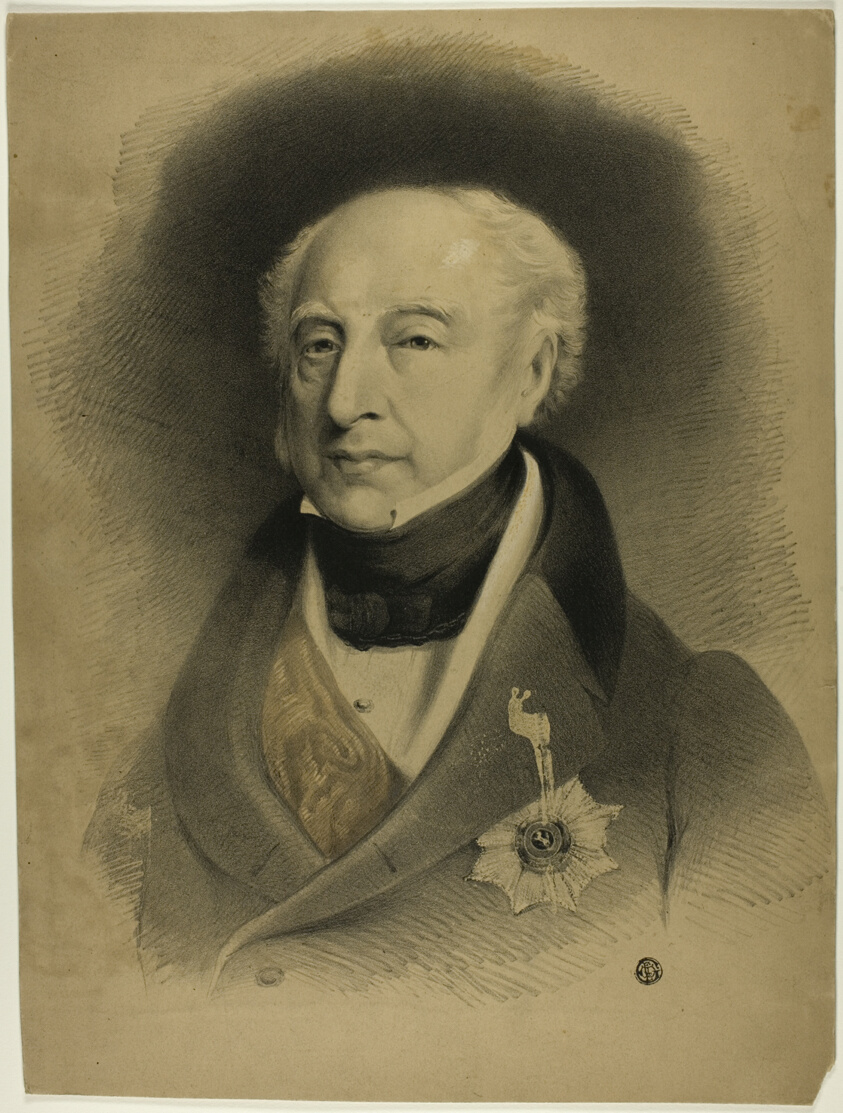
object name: Print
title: Duke of Cambridge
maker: Artist Unknown; likely European, 19th-early 20th century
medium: Lithograph heightened with white and reddish-toned chalks on paper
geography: Europe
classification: lithograph; print; prints and drawing